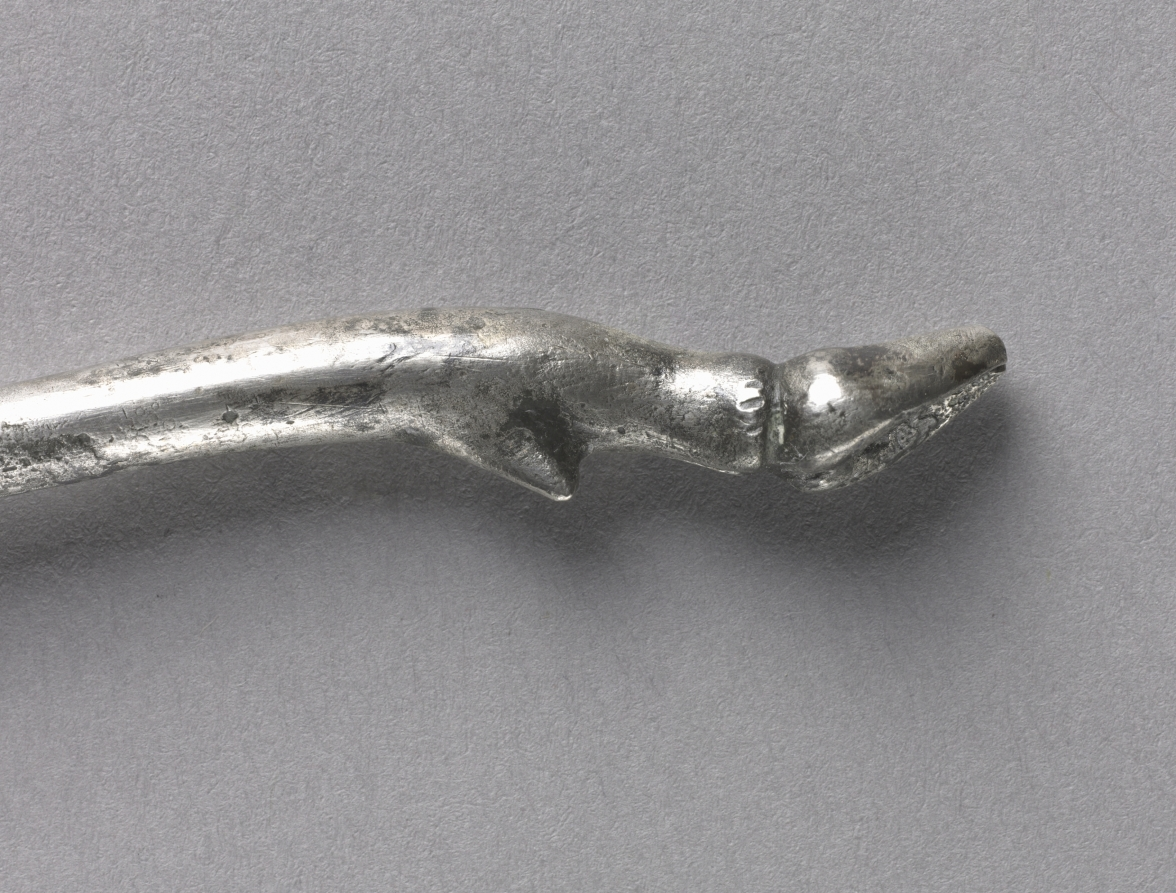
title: Fork with Animal Hoof Finial (Ornament)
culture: Byzantium, Syria(?), Byzantine period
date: 300s CE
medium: silver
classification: Metalwork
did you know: In the 10th century, forks like this one were common in Byzantium. During this same period in Western Europe, people usually ate with their fingers, thinking that forks were decadent.